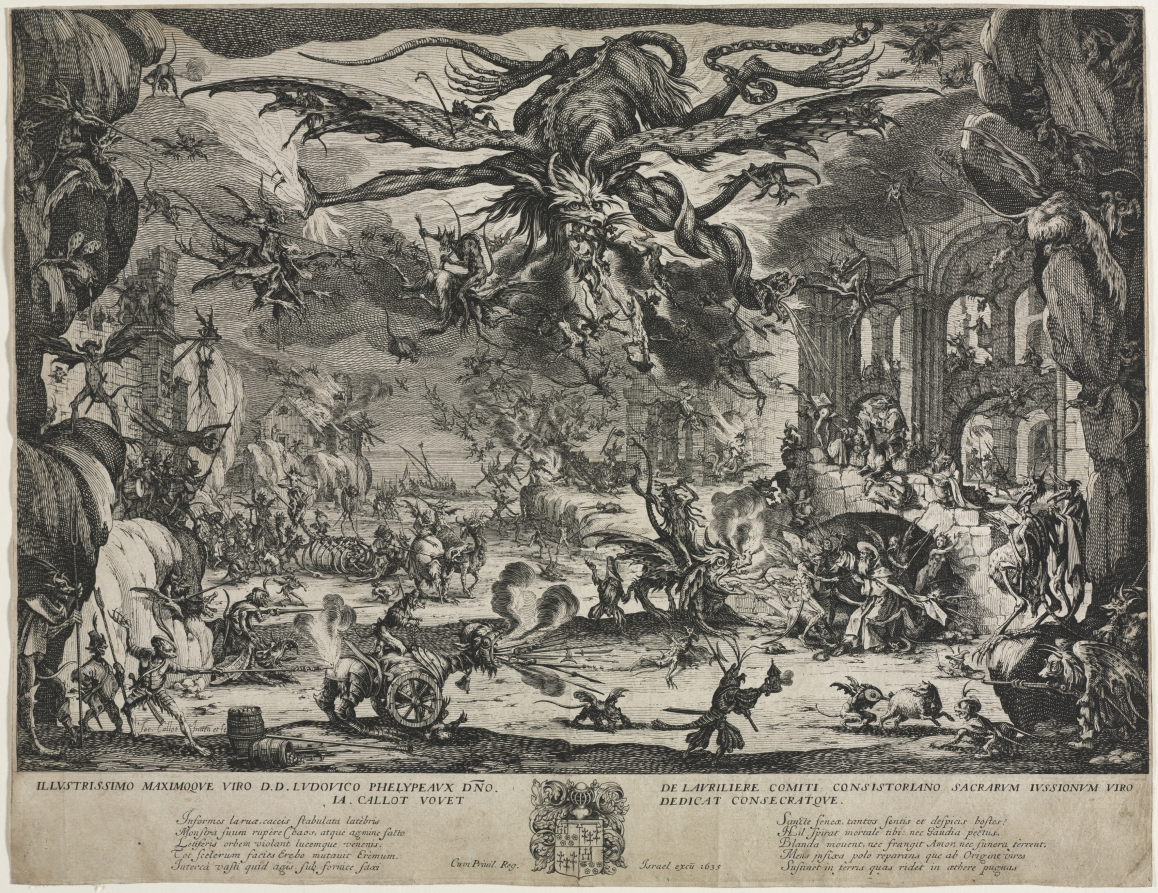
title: The Temptation of Saint Anthony (second version)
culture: France, 17th century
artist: Jacques Callot (French, 1592–1635)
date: 1635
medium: etching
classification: Print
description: The Witches' Sabbath was said to be the meeting of sinister forces for devil worship through dancing, feasting, or sacrifices. In depicting this orgy of bodies and monsters, artists often borrowed from religious imagery. Numerous Renaissance images provided Jacques Callot with a litany of fantastic creatures for his widely influential Temptation of Saint Anthony, depicting the steadfast saint as he endures the mental and spiritual tortures of hell.